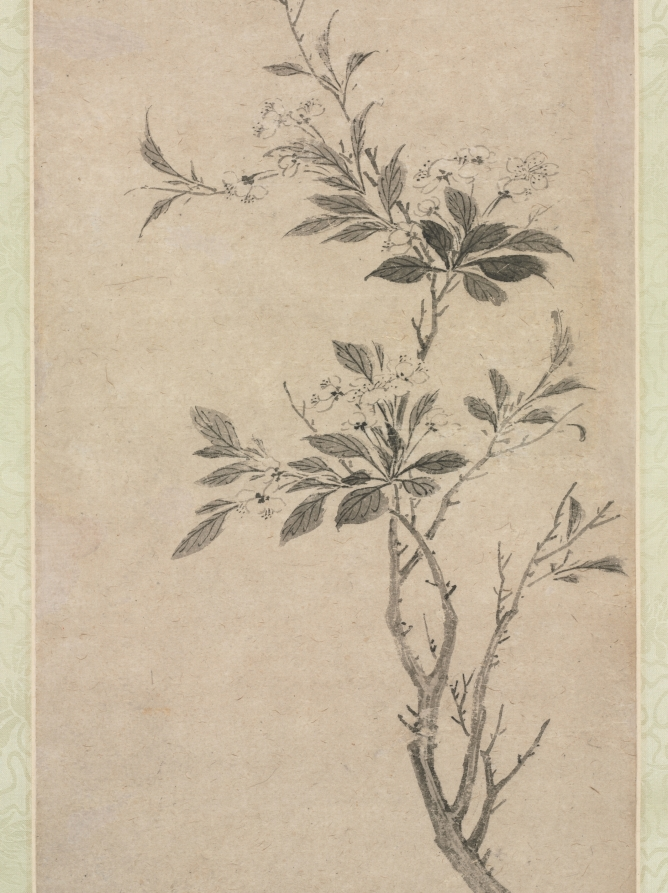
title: Flowering Crab Apple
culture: China, Ming dynasty (1368–1644)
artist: Shen Zhou (Chinese, 1427–1509)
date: 1500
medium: hanging scroll, ink on paper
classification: Painting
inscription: 粧[粉]合胭脂作曉粧，富於顔色吝於香。 東風不肯全分付，相對梅花各斷腸。 弘治庚申春日, 在雙蛾僧舍見海棠盛開, 適值陸汝器在坐索圖, 此繪以寄興。 長洲沈周 [印]啟南; 石田; 白石翁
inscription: 1 additional seal of Wu Yun 吳雲 (1811-1883).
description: Shen Zhou painted a broken branch (zhezhi 折枝) of crab apple, a fragment of nature rather than the full plant in its natural context. Shen uses calligraphic outlines in pure ink to depict the flower petals. The swift yet precise brushstrokes together with the slight S-shaped branch convey vitality. The inscription is a poem written by the artist, commenting on the lovely color and melancholic aura of the crab apple blossom. Shen Zhou is the founder of the Wu School, a group of scholars and officials active around Suzhou in eastern China, known for practicing painting and calligraphy in a refined and elegant style.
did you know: Shen Zhou painted this is an informal and rapidly done presentation picture when he was 74 years old.